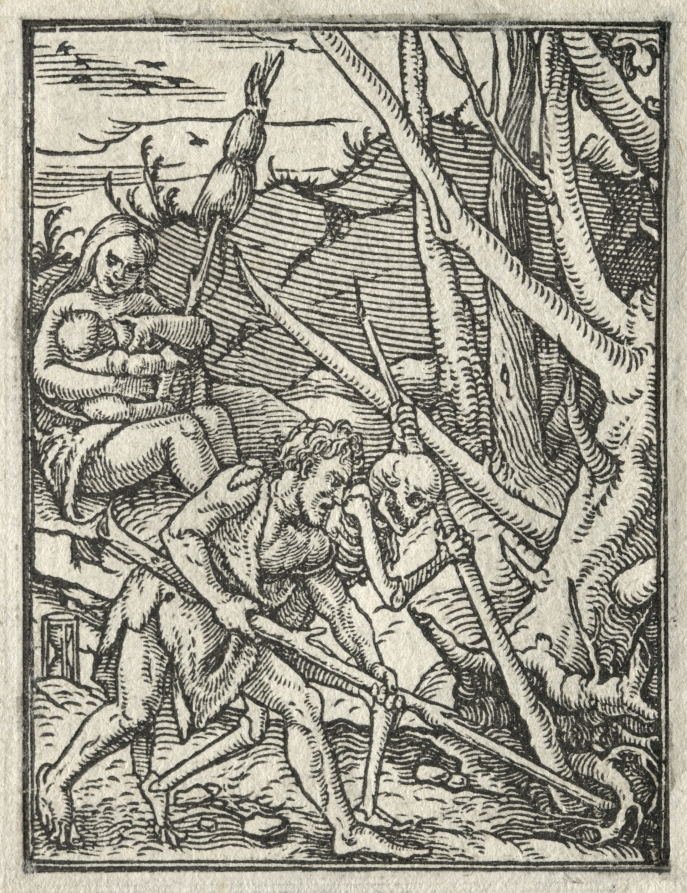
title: The Dance of Death: Expulsion from Paradise; Adam Cultivating the Ground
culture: Germany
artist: Hans Holbein the Younger (German, active England and Switzerland, 1497/98–1543)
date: c. 1526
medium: woodcut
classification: Print